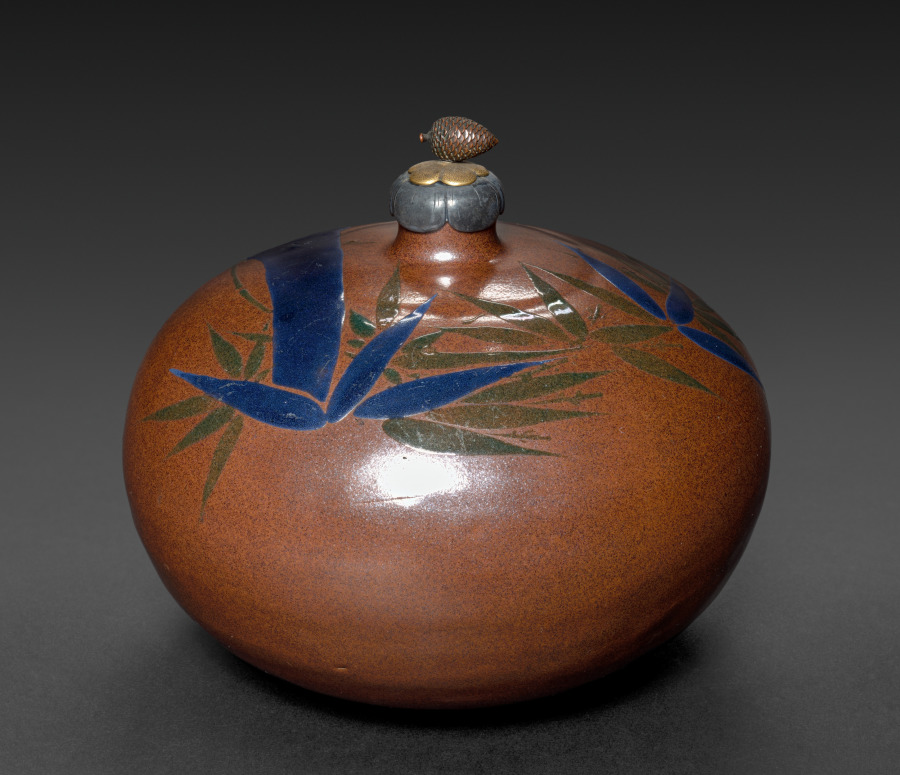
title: Jar with Stopple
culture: Japan, Edo period (1615–1868)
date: 1700s to mid-1800s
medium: stoneware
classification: Ceramic